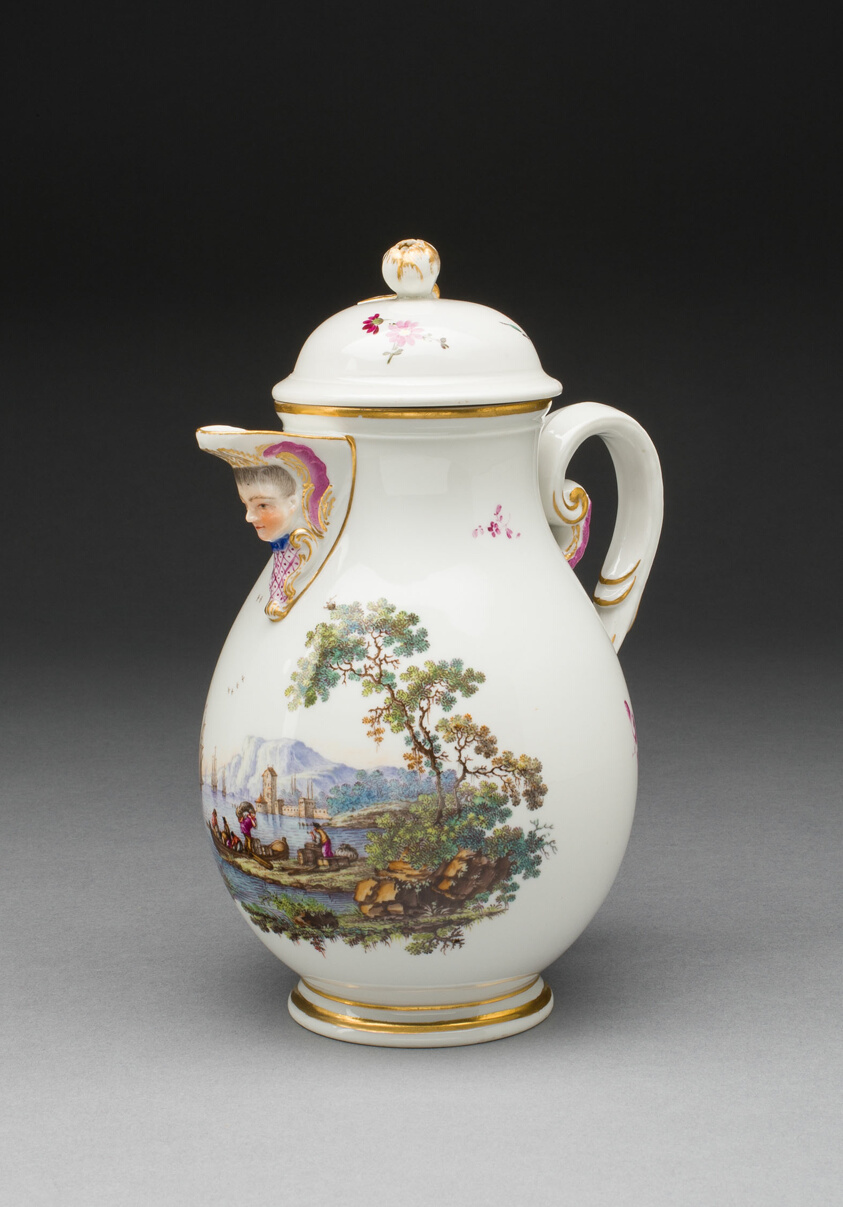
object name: Ceramics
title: Coffee Pot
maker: Ansbach Pottery and Porcelain Factory, decorated in the Hague; German, c. 1708-1839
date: c. 1770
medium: Hard-paste porcelain, polychrome enamels, and gilding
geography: Ansbach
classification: teaware; porcelain; european decorative arts; ceramics